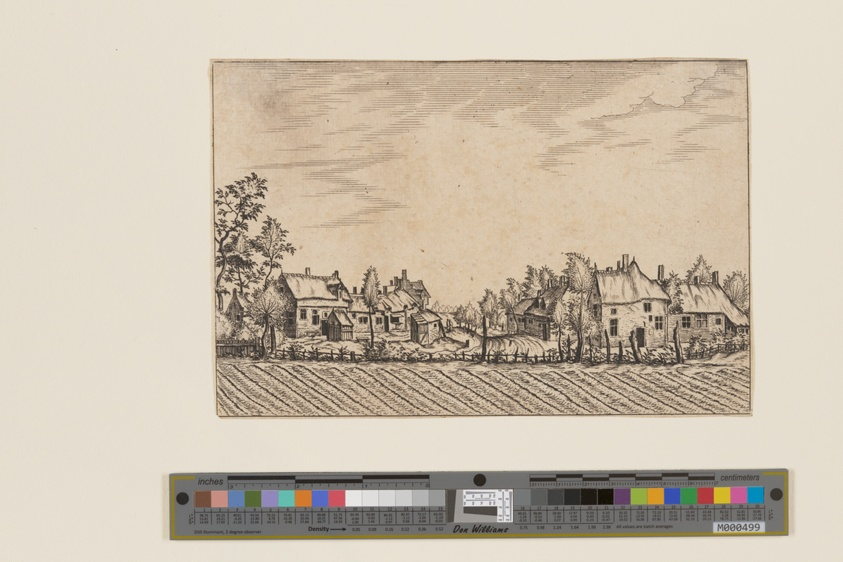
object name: Print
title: Farms, Ploughed Field in the Foreground, from Master of the Small Landscape Series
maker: Johannes van Doetecum (Netherlandish, 1528/32–1605) and Lucas Doetecum (Dutch, died before 1584); after the Master of the Small Landscapes (Flemish, active 1555-1600)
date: c. 1560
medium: Engraving on ivory laid paper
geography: Netherlands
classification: engraving; paper; print; prints and drawing